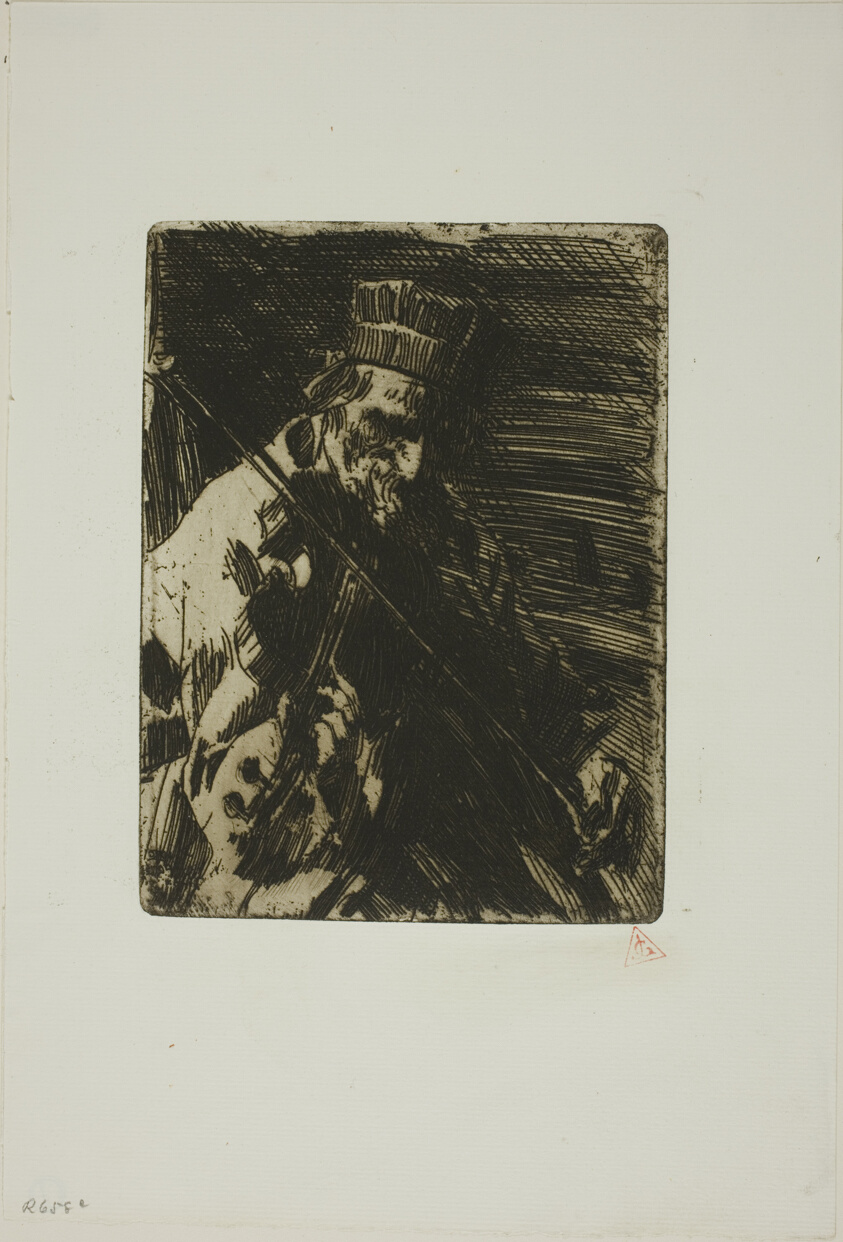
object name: Print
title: Village Violinist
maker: Anders Zorn (Swedish, 1860-1920)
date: 1904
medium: Etching on white laid paper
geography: Sweden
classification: etching; print; prints and drawing